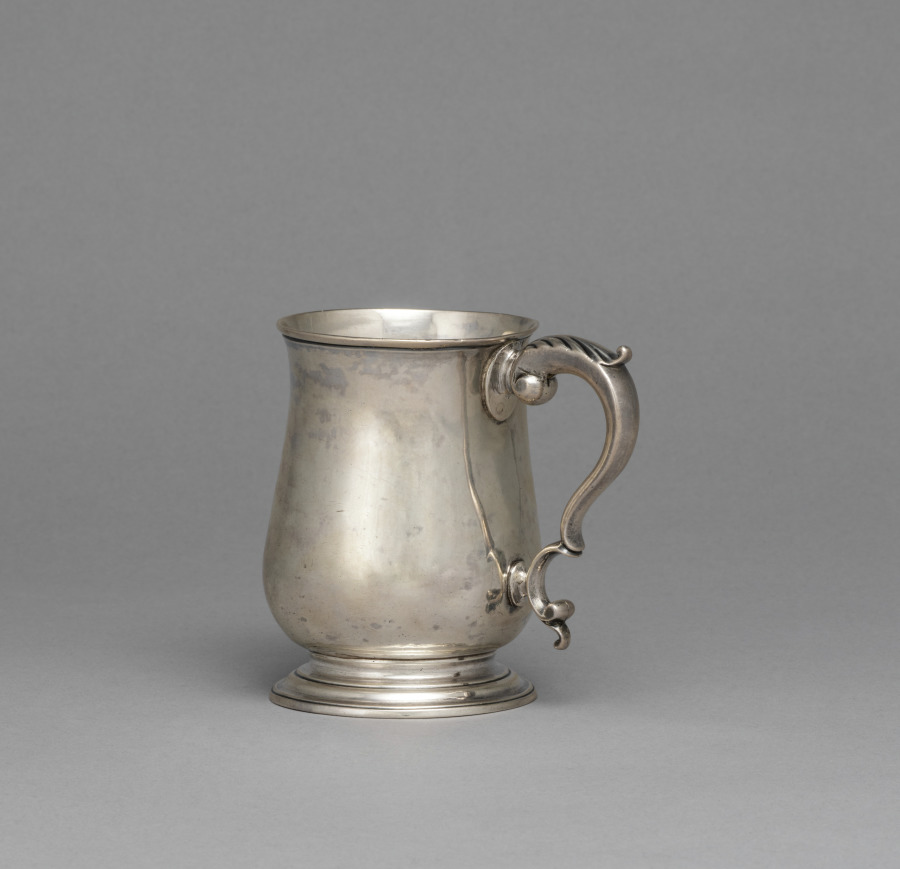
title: Cann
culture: America, Maryland, Baltimore, 18th century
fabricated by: Thomas Sparrow (American, 1746-)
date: c. 1770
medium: silver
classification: Silver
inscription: engraved "JSR" in foliate script on front, opposite handle.